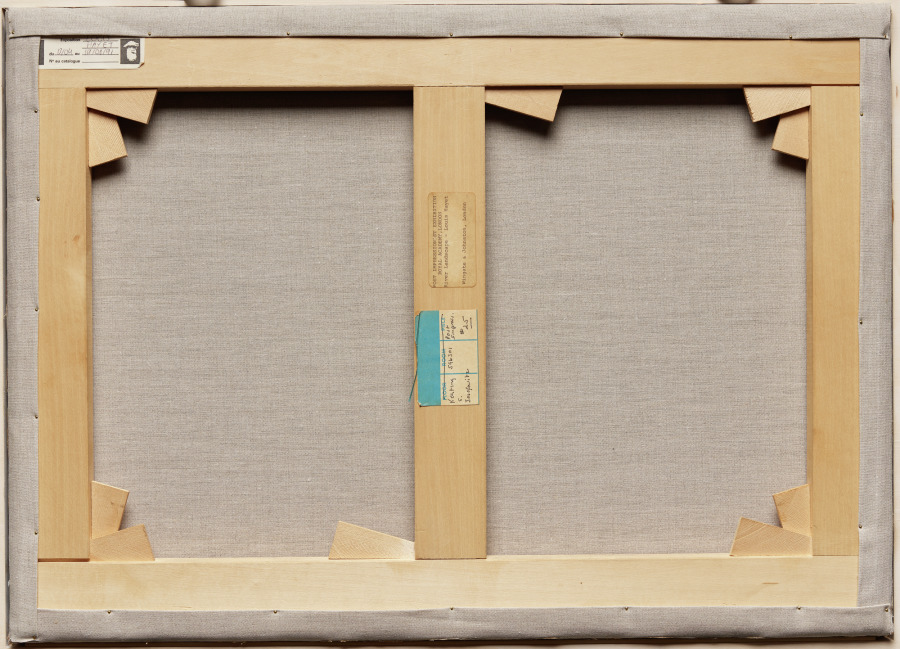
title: Banks of the Oise at Dawn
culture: France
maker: Louis Hayet (French, 1864–1940)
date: 1888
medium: Oil on canvas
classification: Painting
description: Louis Hayet was an important, early practitioner of Neo-Impressionism, or Pointillism, the practice of applying small strokes or dots of paint so that from a distance the hues visually blend together and create an intense sensation of color and light. Notice the way in which Hayet painted the pale dawn sky—and its reflection in the River Oise—with strokes of pink, orange, blue, yellow, and green paint. When seen at a distance, the effect is of early morning, before the sun has fully risen.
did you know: Hayet received considerable critical praise for his original idea of developing a Neo-Impressionist color chart that incorporates gray tones.